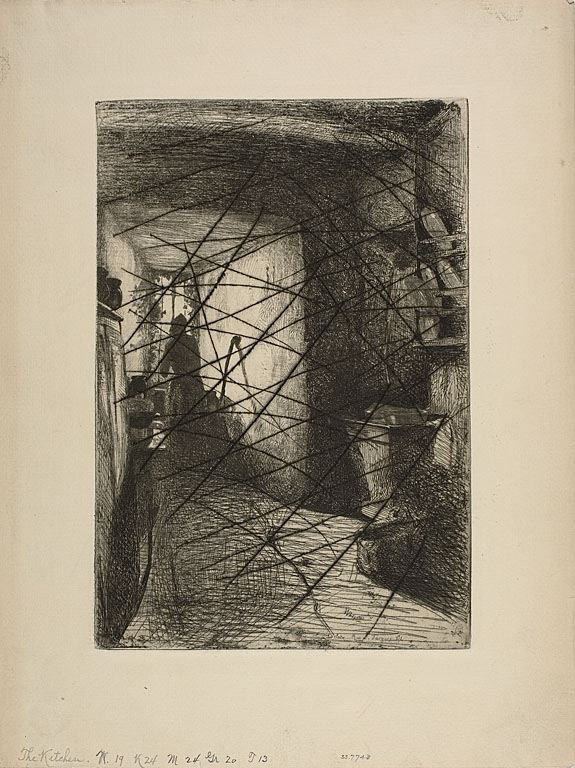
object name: Print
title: The Kitchen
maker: James McNeill Whistler (American, 1834-1903)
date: 1858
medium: Etching with drypoint cancellation, in black ink on ivory laid paper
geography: United States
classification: etching; print; prints and drawing; drypoint; paper